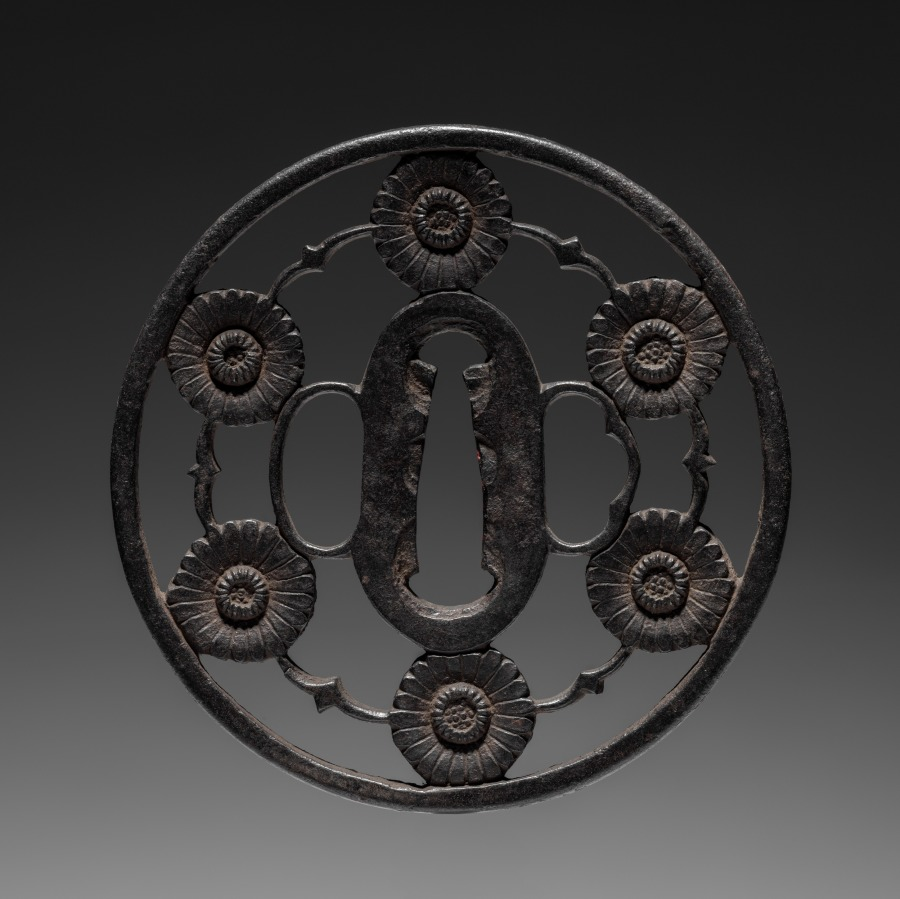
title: Sword Guard (Tsuba) with Flowers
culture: Japan, possibly Edo period (1615-1868)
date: c. 1615–1868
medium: iron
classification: Arms and Armor